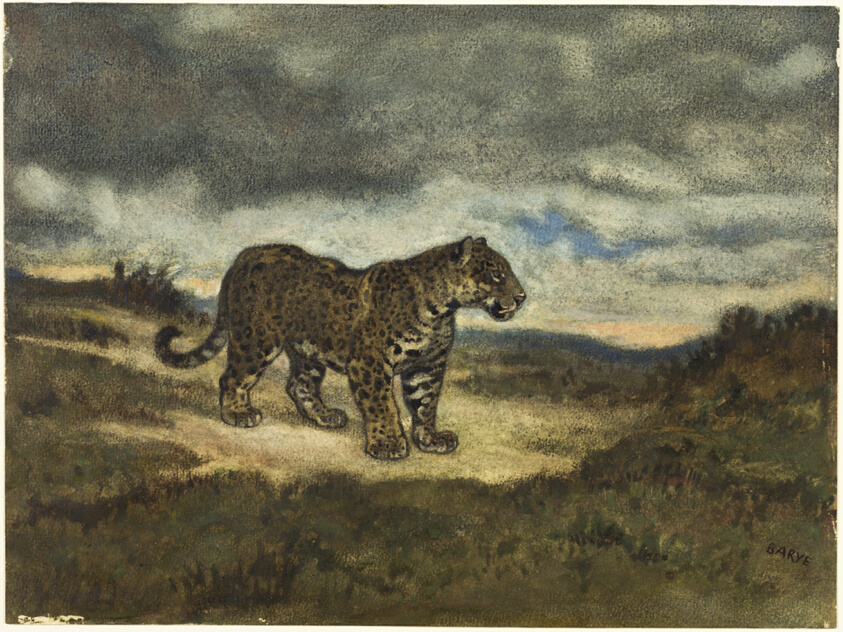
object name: Drawing and Watercolor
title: Jaguar Standing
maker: Antoine Louis Barye (French, 1795-1875)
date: 1830/50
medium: Watercolor, with black crayon, touches of gouache, and wiping, on cream laid paper, laid down on Japanese paper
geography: France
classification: watercolor; drawings (visual works); prints and drawing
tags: Century of Progress, world's fairs, Chicago World's Fairs